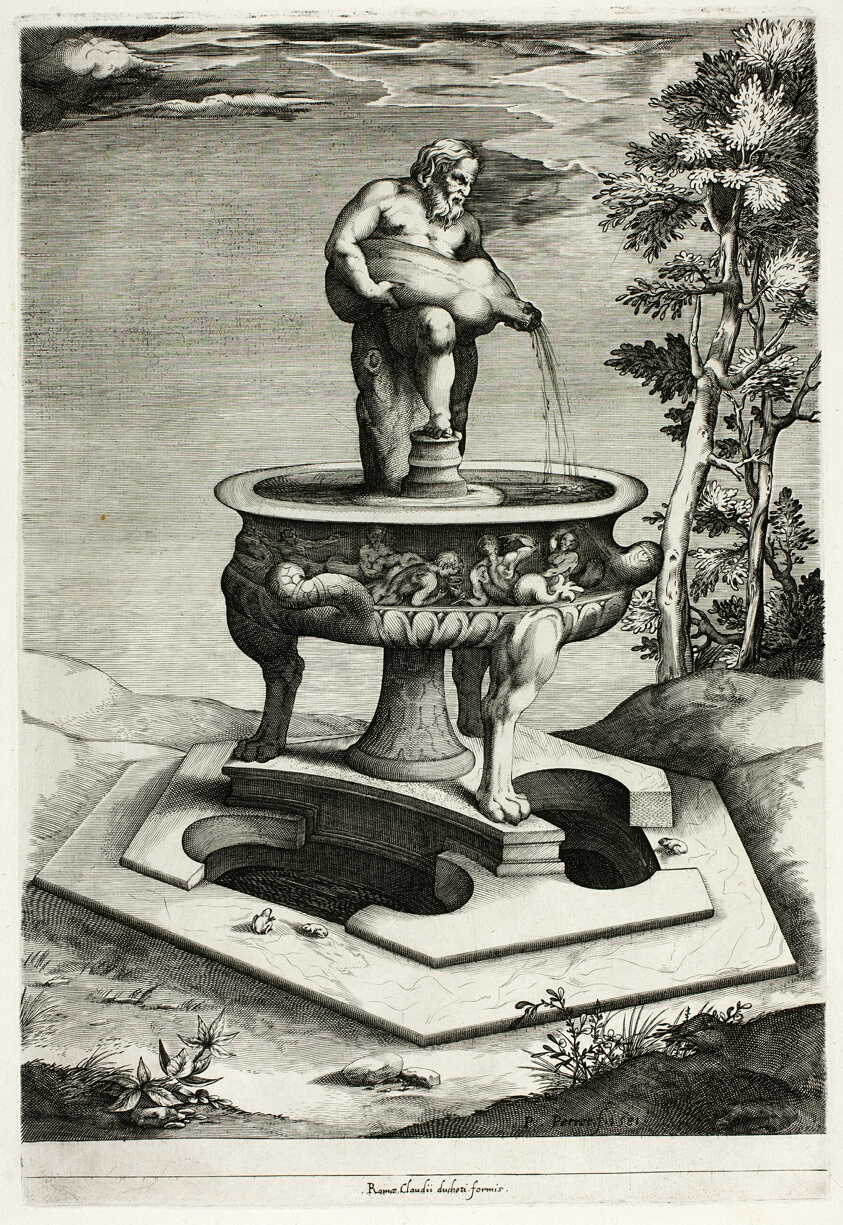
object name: Print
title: Fountain with Silenus in the Garden of the Cesi Palace near Rome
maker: Pieter Perret (Flemish, 1555–1639); published by Claudio Duchetti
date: 1581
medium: Engraving in black on ivory laid paper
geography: Flanders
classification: engraving; paper; print; prints and drawing